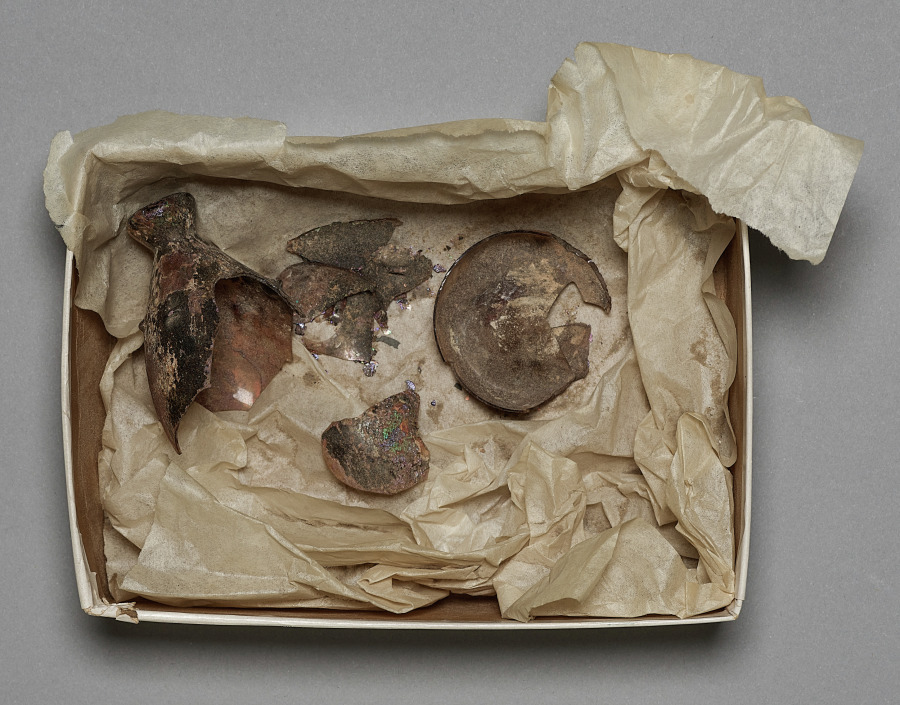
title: Bottle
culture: Syria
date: 900s–1100s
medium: glass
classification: Glass